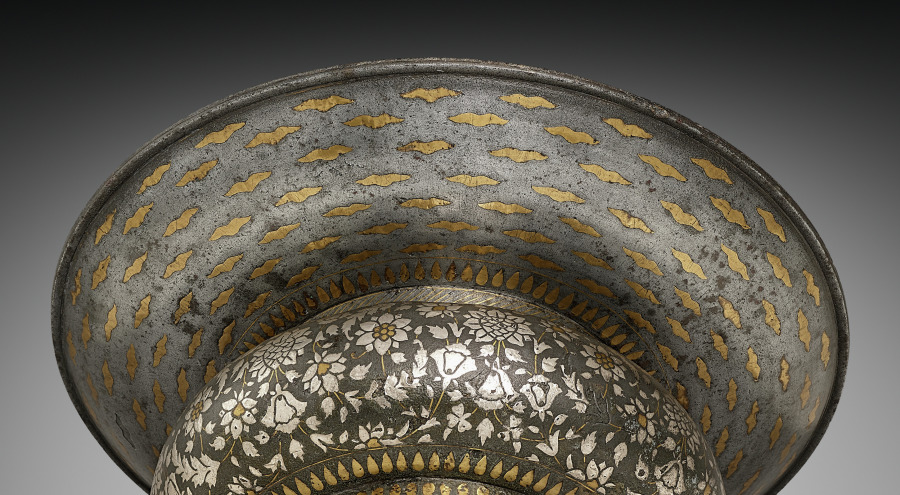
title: Bidri Basin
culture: Southwestern India, Deccan, Karnataka, Bidar​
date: c. 1650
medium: Zinc alloy with silver and brass inlay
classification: Metalwork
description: Wide-rimmed basins called sailabchi were used to catch water poured from a pitcher during hand washing before prayer and before and after meals. A sumptuous example such as this was made for an elite setting. Every element of the allover floral arabesque was cut from silver and brass sheets or wire and hammered into the cast zinc alloy vessel in a distinctive technique developed in southern India.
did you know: Zinc alloy does not rust or corrode, in contrast to steel or copper alloys.